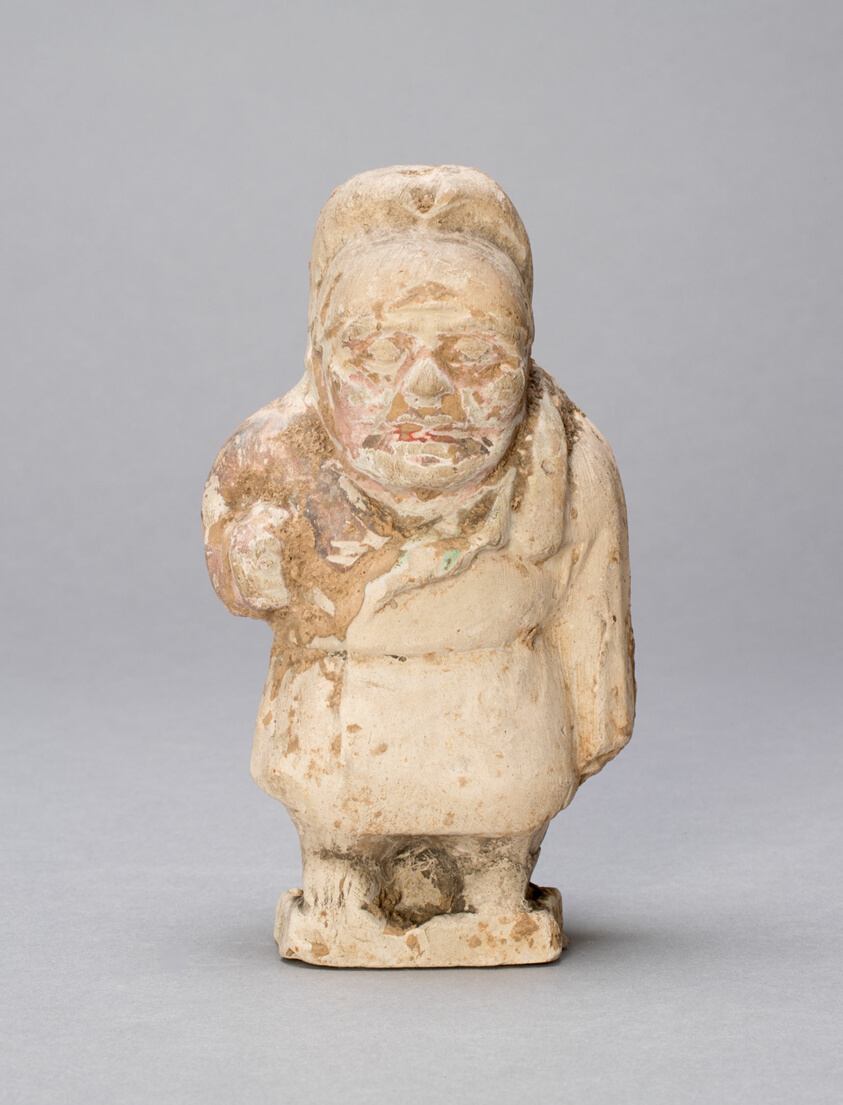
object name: Sculpture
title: Dwarf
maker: China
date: Tang dynasty (618–906)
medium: Earthenware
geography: China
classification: ceramics; asian art; sculpture